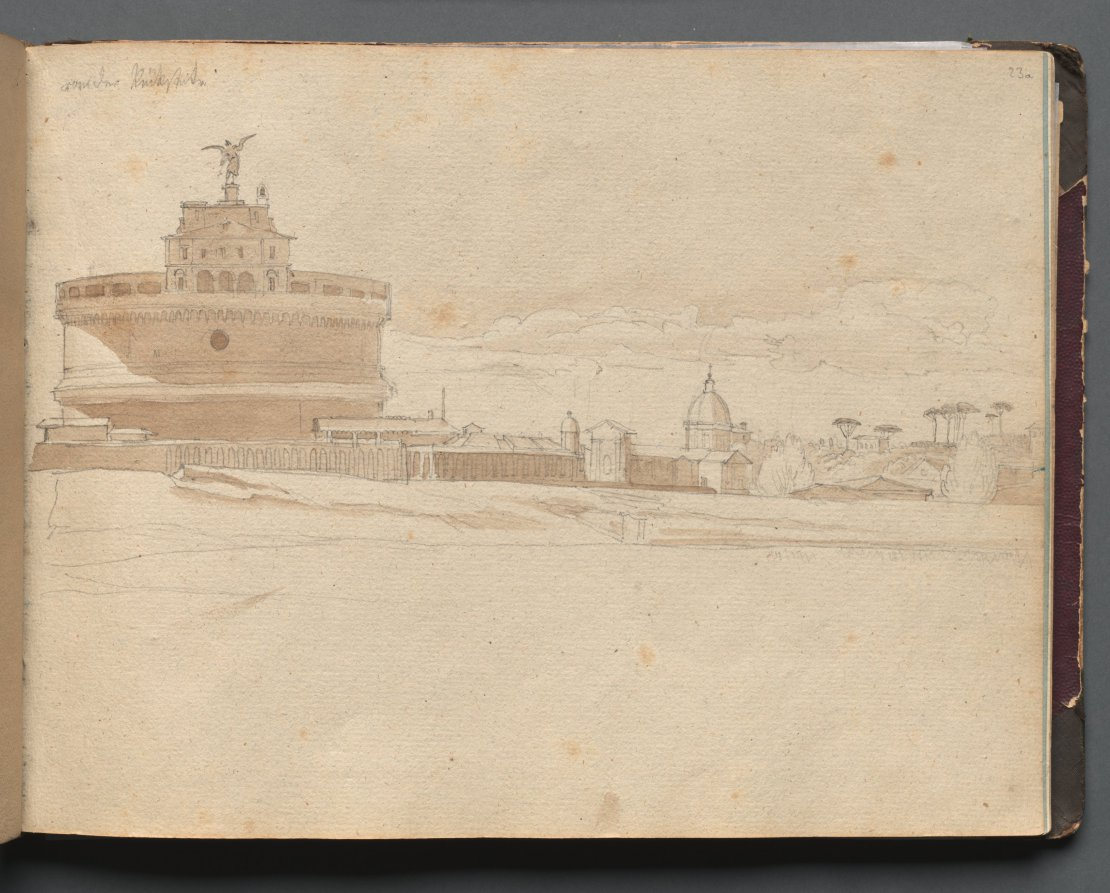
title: Album with Views of Rome and Surroundings, Landscape Studies, page 23a: Castle Saint Angelo, Rome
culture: Germany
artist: Franz Johann Heinrich Nadorp (German, 1794–1876)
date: c. 1830s-70s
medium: graphite and brown wash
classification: Bound Volume